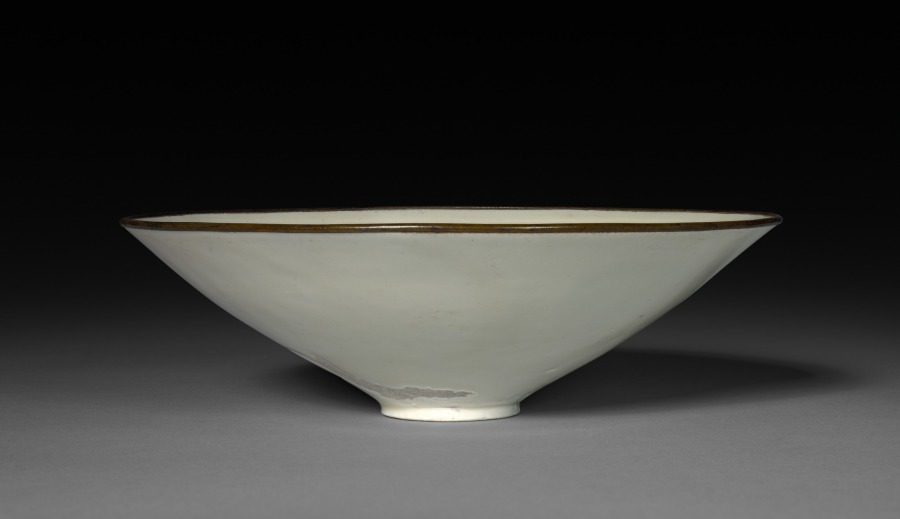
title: Bowl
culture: China, Hebei province, Chuyang District, Jin dynasty (1115-1234)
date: 12th Century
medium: White porcelain, Ding ware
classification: Ceramic